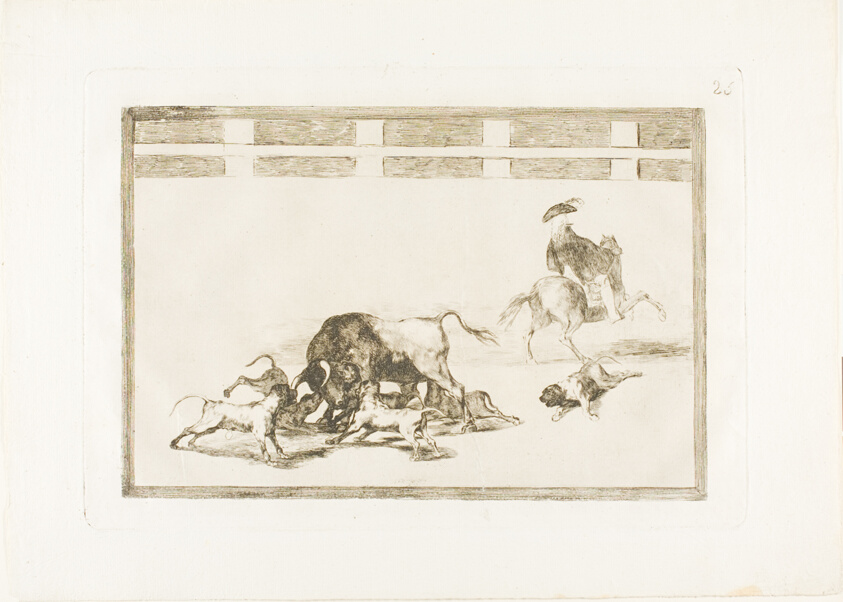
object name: Print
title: They Loose Dogs on the Bull, plate 25 from The Art of Bullfighting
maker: Francisco José de Goya y Lucientes (Spanish, 1746-1828)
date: 1814/16, published 1816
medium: Etching, burnished aquatint and drypoint on ivory laid paper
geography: Spain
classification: etching; print; prints and drawing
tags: dogs, animals